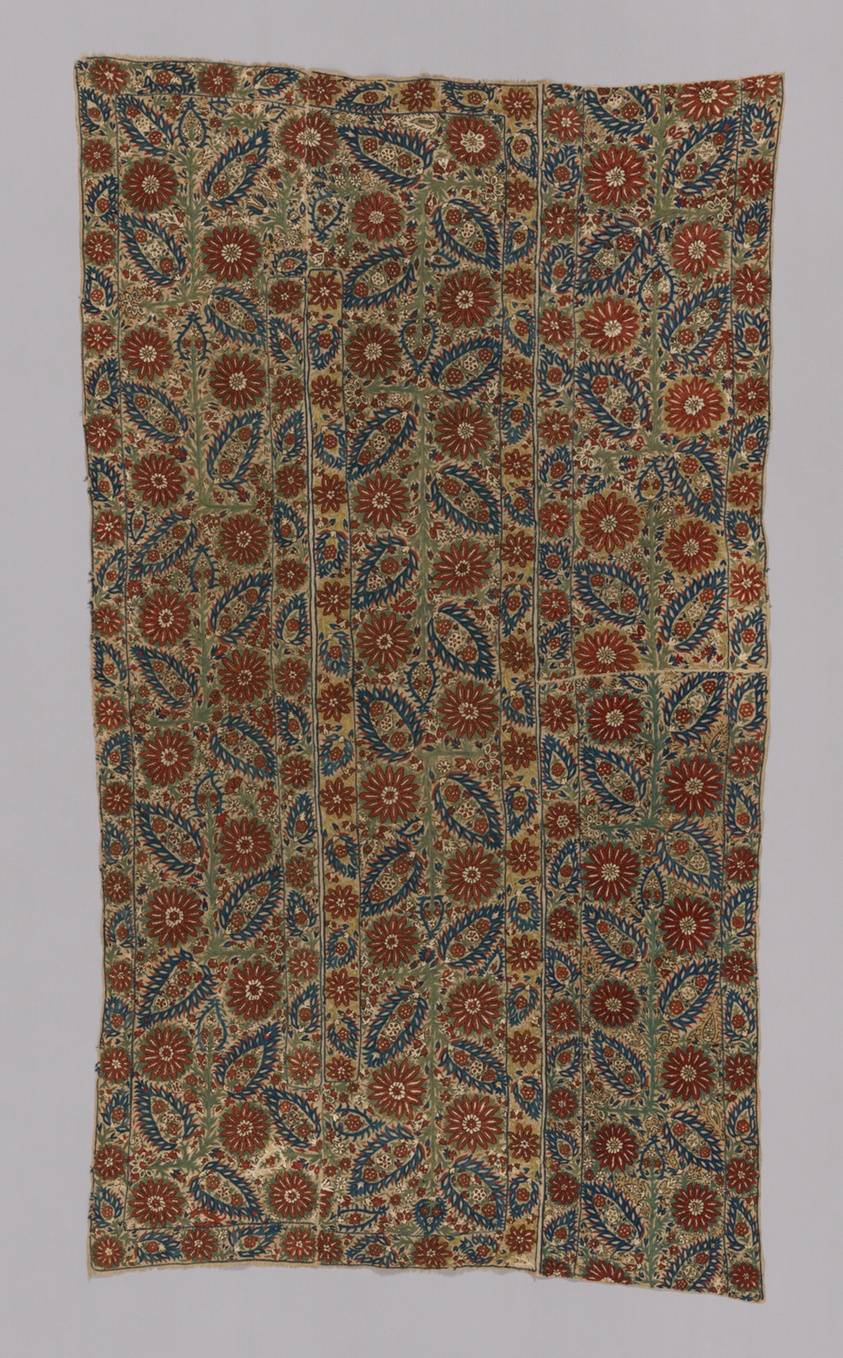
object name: Textile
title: Bedcover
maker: Greece, Epirus, Ioannina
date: 18th century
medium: Linen, plain weave; embroidered with silk yarns in chain, closed herringbone, and stem stitches; couching; three loom widths joined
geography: Greece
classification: textile; needlework (visual works)